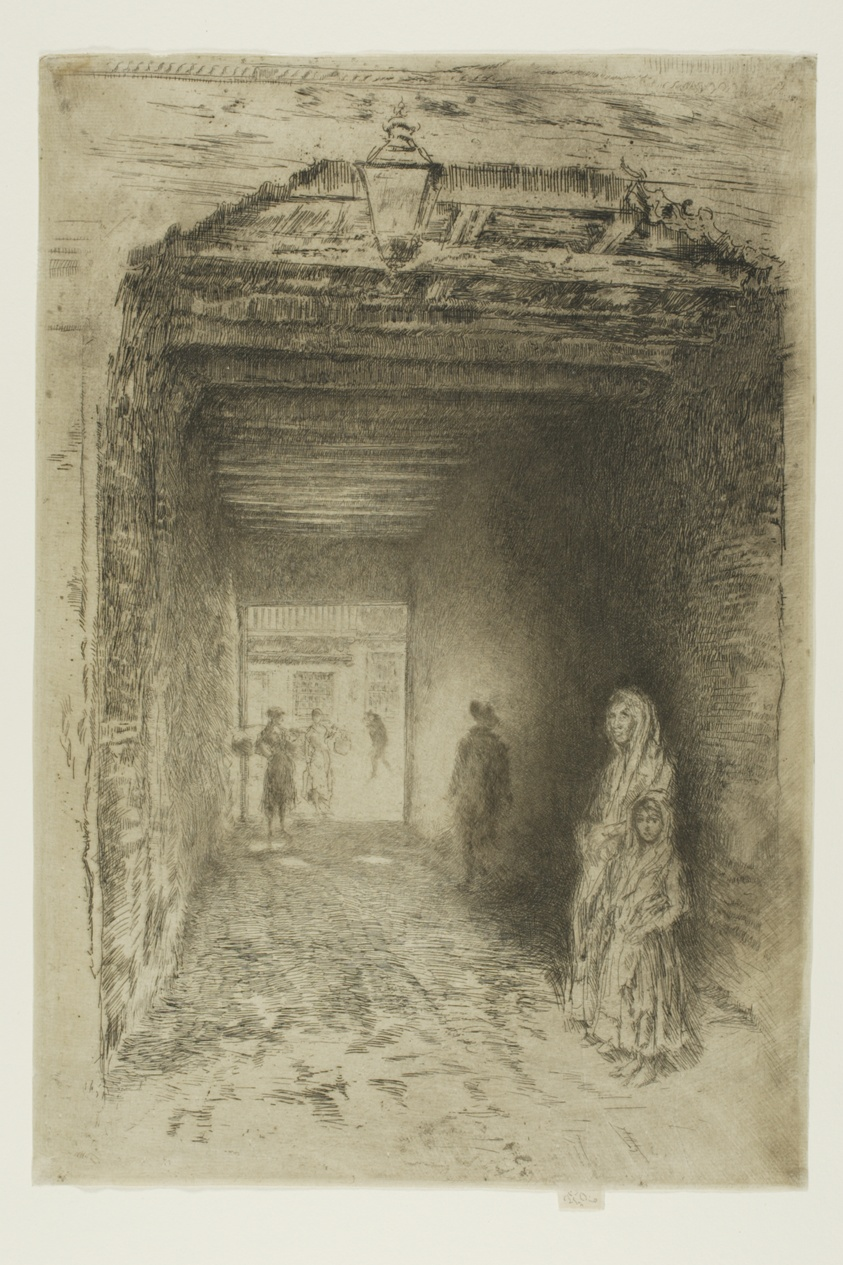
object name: Print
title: The Beggars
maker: James McNeill Whistler (American, 1834-1903)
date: 1879/80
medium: Etching and drypoint with foul biting in dark brown ink on ivory laid paper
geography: United States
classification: etching; foul biting; print; prints and drawing; drypoint; paper